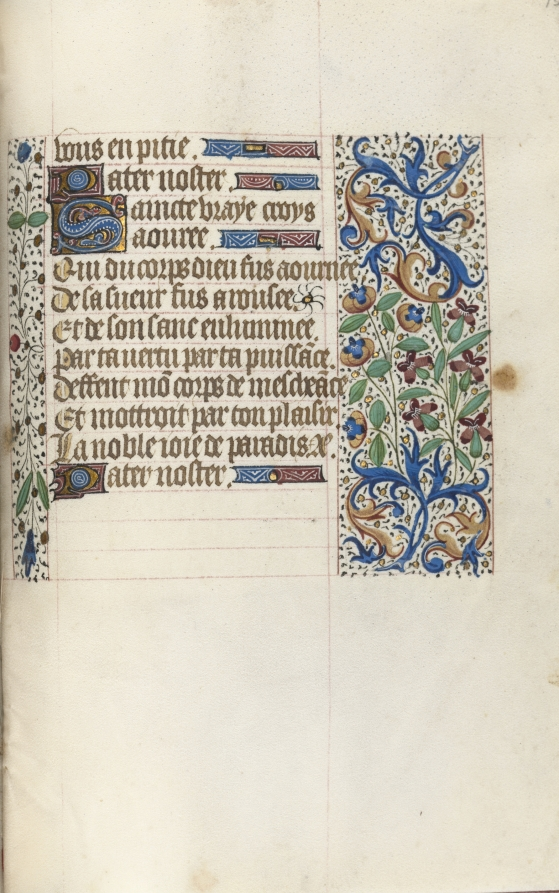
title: Book of Hours (Use of Rouen): fol. 154r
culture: France, Rouen, 15th century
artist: Master of the Geneva Latini (French, active Rouen, 1460–80)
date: c. 1470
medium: ink, tempera, and gold on vellum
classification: Bound Volume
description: In the late 1400s and early 1500s Rouen was an established and important center of book production. The city’s cathedral had a wealthy chapter that spent large sums of money to commission books and to maintain its extensive library. The stationers and booksellers would have likely been concentrated in or near the cathedral precinct. This artist, named after a manuscript now in Geneva, was Rouen’s principal illuminator during the second half of the 1400s.